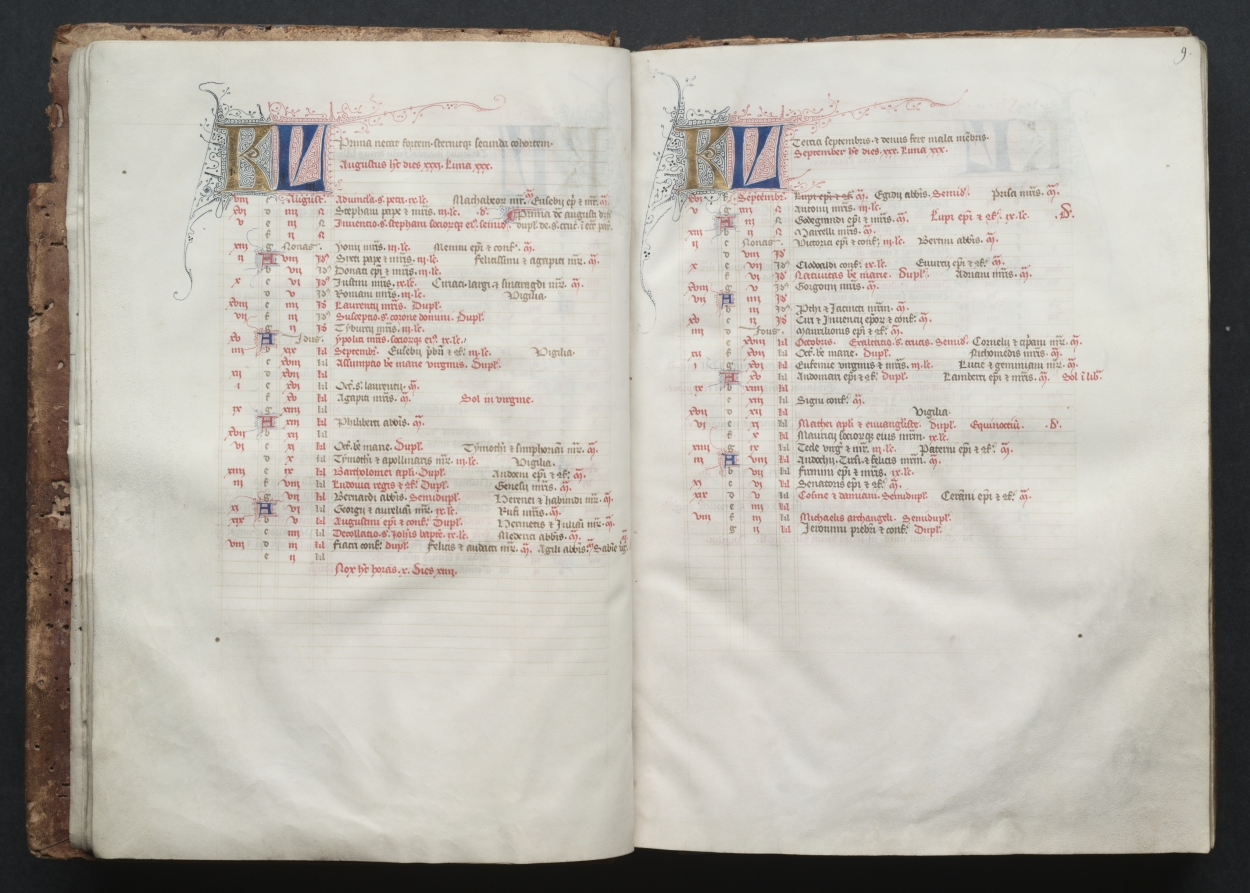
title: The Gotha Missal: Fol. 9r, Text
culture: France, Paris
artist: Master of the Boqueteaux (French)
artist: and Workshop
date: c. 1375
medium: ink, tempera, and gold on vellum; blind-tooled leather binding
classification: Bound Volume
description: The style and quality of this manuscript's decoration is typical of deluxe Parisian books made for aristocratic or royal patrons. Most of the book's decoration appears to be the work of the Master of the Boqueteaux, an artist active at the court of King Charles V (died 1380). His style was apparently shared by a number of book illuminators working in and around Paris. It is very possible that the Gotha Missal belonged to Charles V, but is not provable because the manuscript has no royal portraits and lacks a colophon. Given the book's magnificent decoration, however, it would seem that it was produced for a Valois prince, if not for the king himself. The manuscript receives its name from the German dukes of Gotha, its later owners.